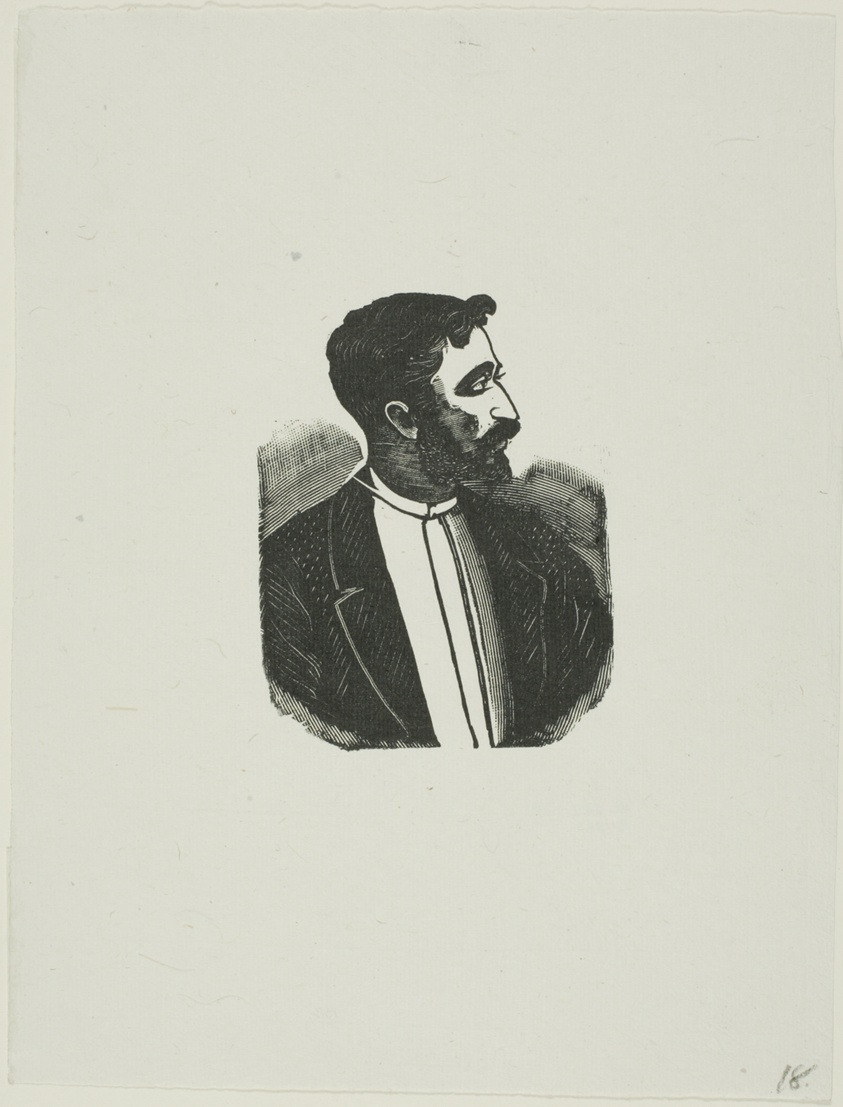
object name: Print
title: Portrait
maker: José Guadalupe Posada (Mexican, 1852-1913)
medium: Engraving on typemetal on paper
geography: Mexico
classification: relief etching; print; prints and drawing